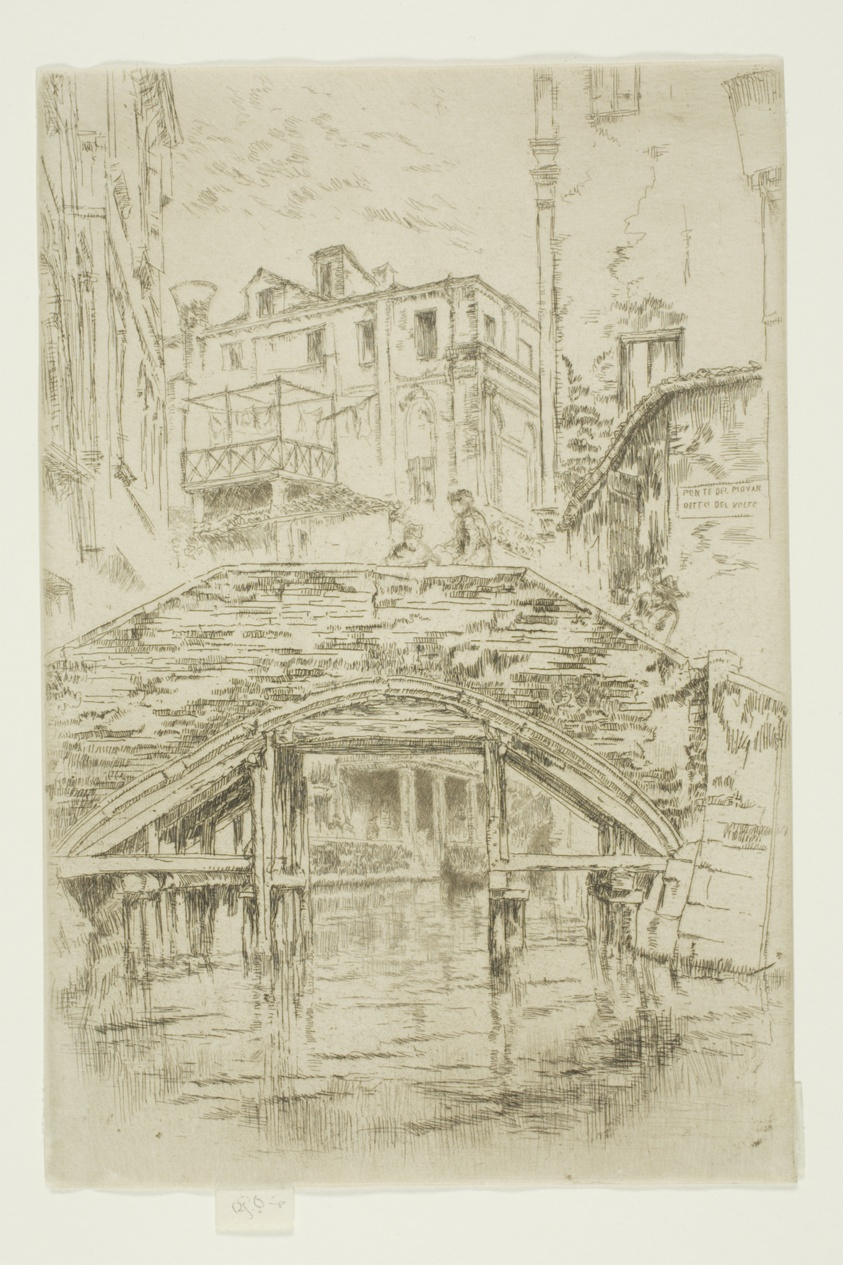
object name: Print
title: Ponte del Piovan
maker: James McNeill Whistler (American, 1834-1903)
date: 1879/80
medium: Etching and drypoint with foul biting in dark brown ink on cream laid paper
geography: United States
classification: etching; foul biting; print; prints and drawing; drypoint; paper